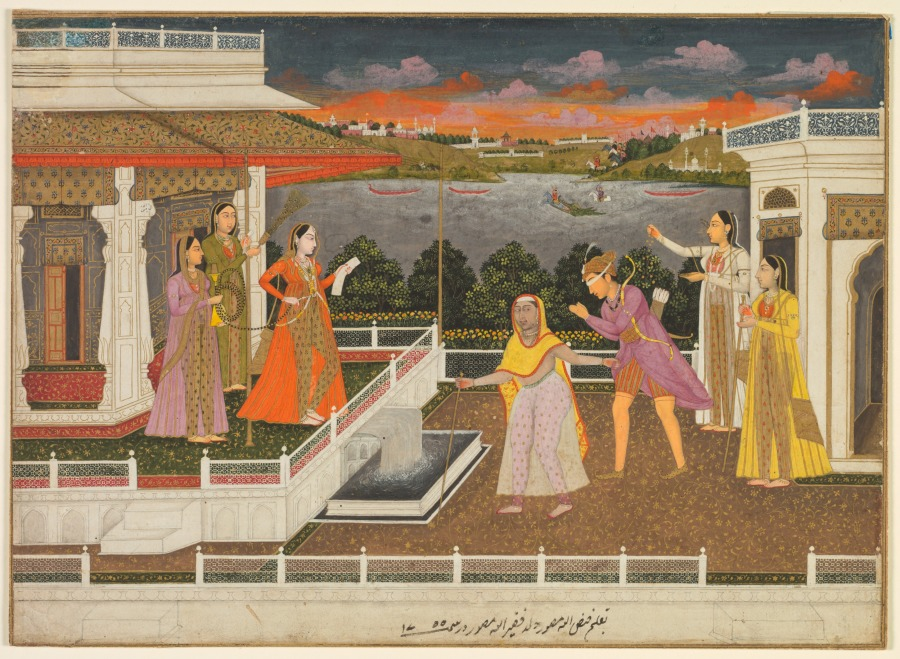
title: A blindfolded suitor is brought before a princess (recto)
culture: India, Lucknow, Mughal, 18th century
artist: Fayzullah (Indian, active c. 1730–1765)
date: 1755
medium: Gum tempera and gold on paper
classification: Painting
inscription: signed in two places: on capital of central pillar: 'amal - i Fayzullah ("the workof Fayzullah"), and below: bi - qalam i Fayzullah Musavvir walad - i Faqirullah Musavvir dar sanna 1755 ("by the pen of Fayazullah the painter son of Faqirullah the painter in the the year 1755")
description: In a scene set on a carpeted terrace in the women’s palace quarters, an older woman of the harem drags a young prince with a white blindfold over his eyes before a princess grasping a document. Such a scene evokes a literary allusion of a princess who selects her suitor, but it also resonates with circumstances at the Mughal court. Signed and dated by the artist, this painting was completed at a time when powerful women wielded control over the emperor, and Ahmad Shah Bahadur (reigned 1748–54), son and successor of Muhammad Shah, had been blinded and deposed less than one year before.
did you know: A gigantic crocodile swallows a horse and rider attempting to cross the river.